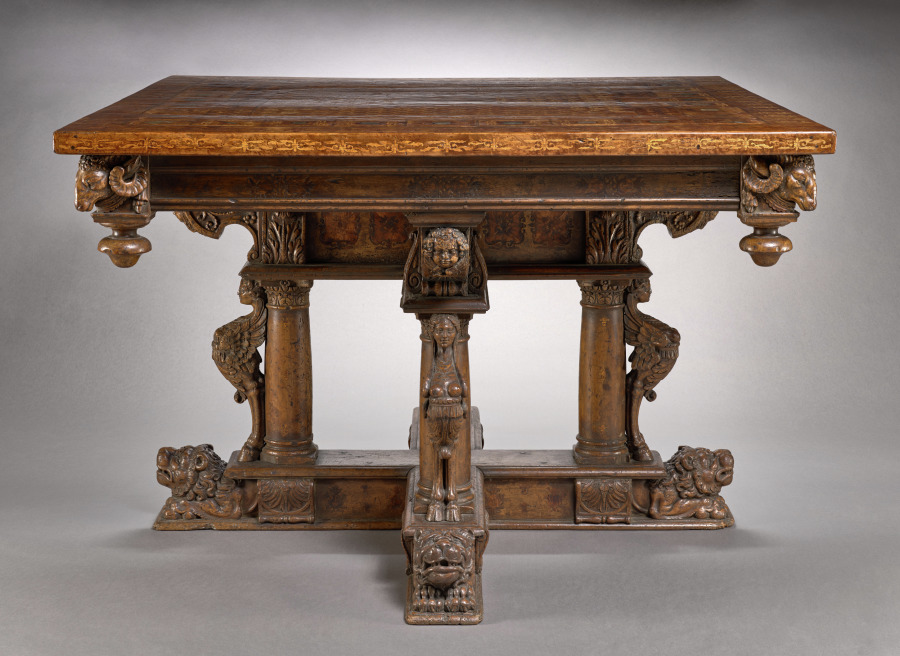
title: Inlaid Table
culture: France, Burgundian School, 16th century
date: 1550–1599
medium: walnut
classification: Furniture and woodwork